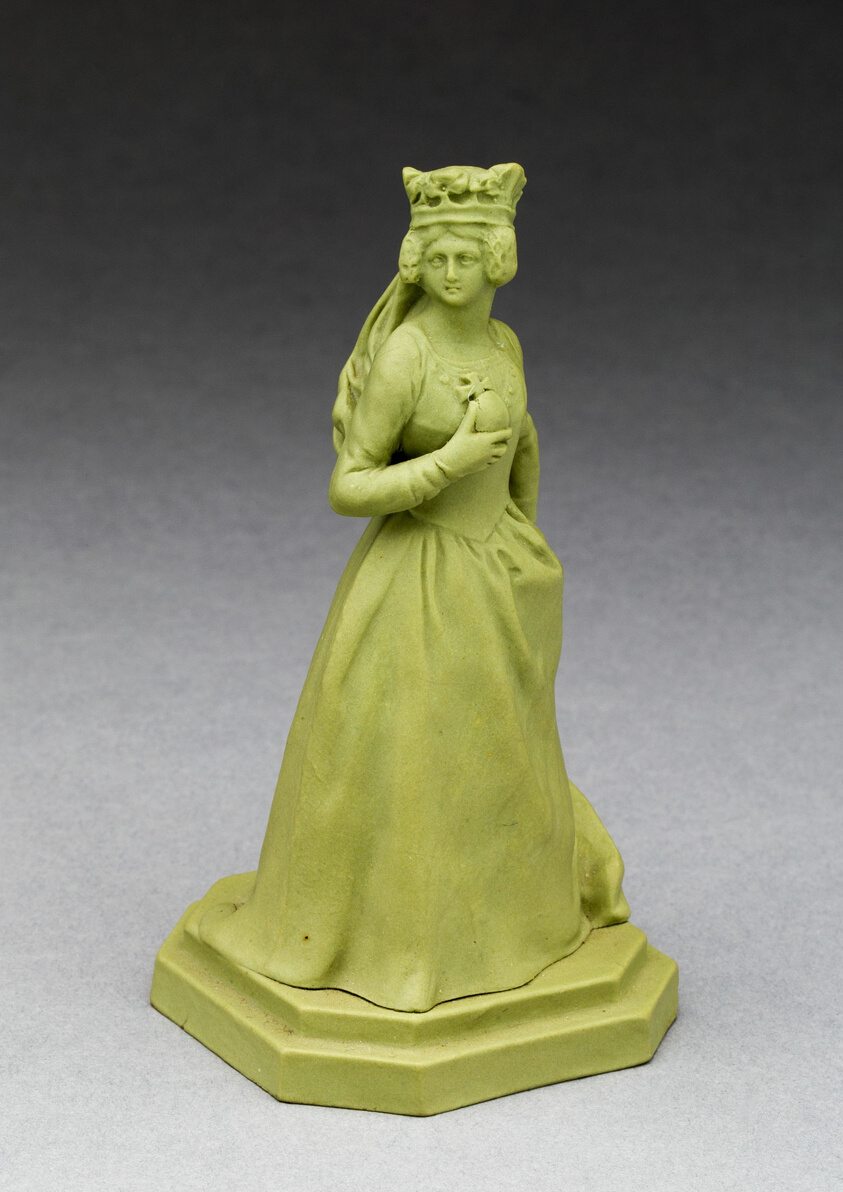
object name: Ceramics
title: Chess Piece: Queen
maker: Wedgwood Manufactory (England, founded 1759)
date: Late 18th century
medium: Stoneware: green jasperware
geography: Burslem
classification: accessories (object genre); stoneware; european decorative arts; ceramics